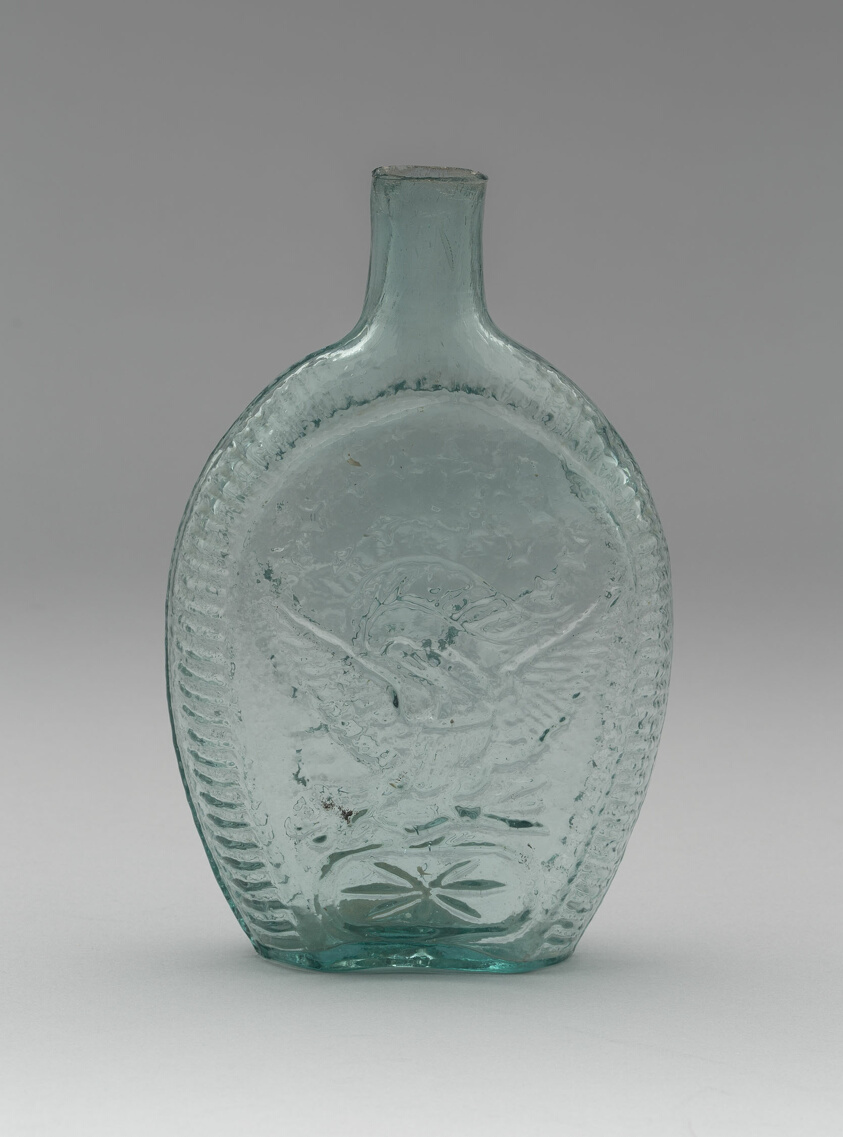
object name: Glass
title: Flask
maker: Attributed to Coffin & Hay; American, 1831–1857; Hammonton, New Jersey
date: 1831–40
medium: Glass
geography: Hammonton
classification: flask (bottle); glass; american decorative arts; american arts; decorative arts